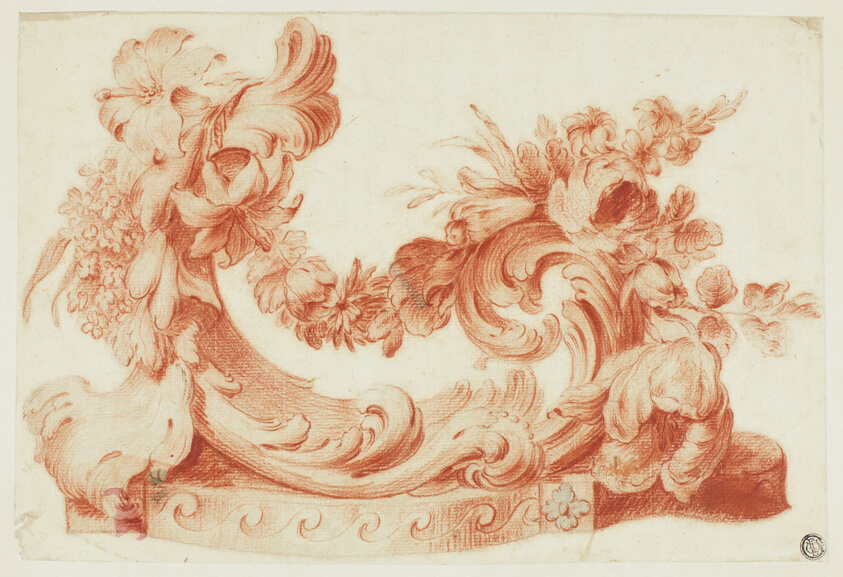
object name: Drawing and Watercolor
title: Ornamental Design with Flowers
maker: Circle of Jean Baptiste Pillement (French, 1719/28-1808); or Nicolas Lancret (French, 1690-1743)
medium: Red chalk over traces of graphite, with touches of watercolor, on cream laid paper, laid down on card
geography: France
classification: chalk; drawings (visual works); prints and drawing